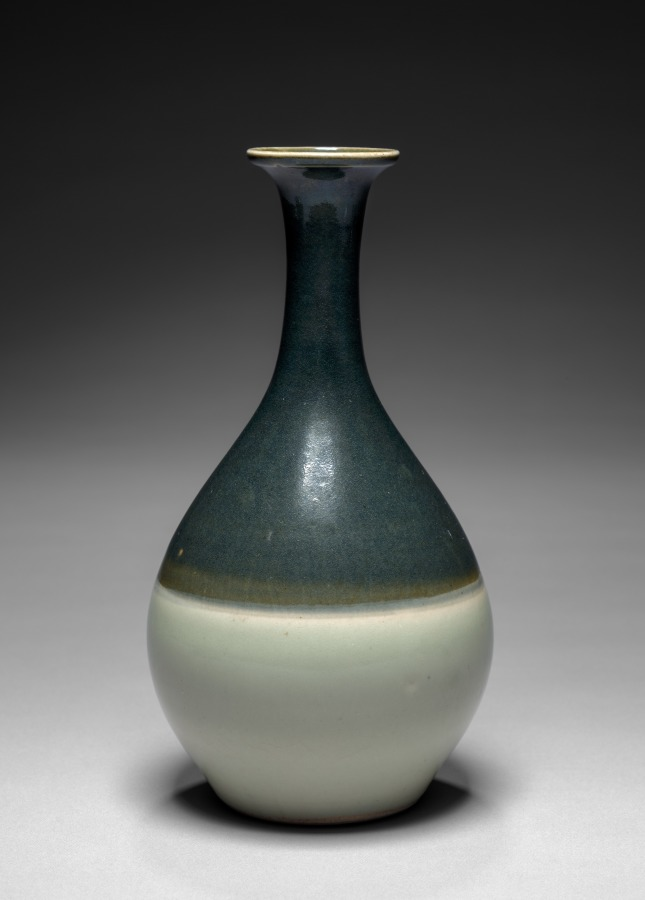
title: Sake Flask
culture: Japan, Edo period (1615–1868)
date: mid- to late 1600s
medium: porcelain with underglaze blue and overglaze celadon decoration (Hizen ware, Arita type, Imari style)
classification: Ceramic